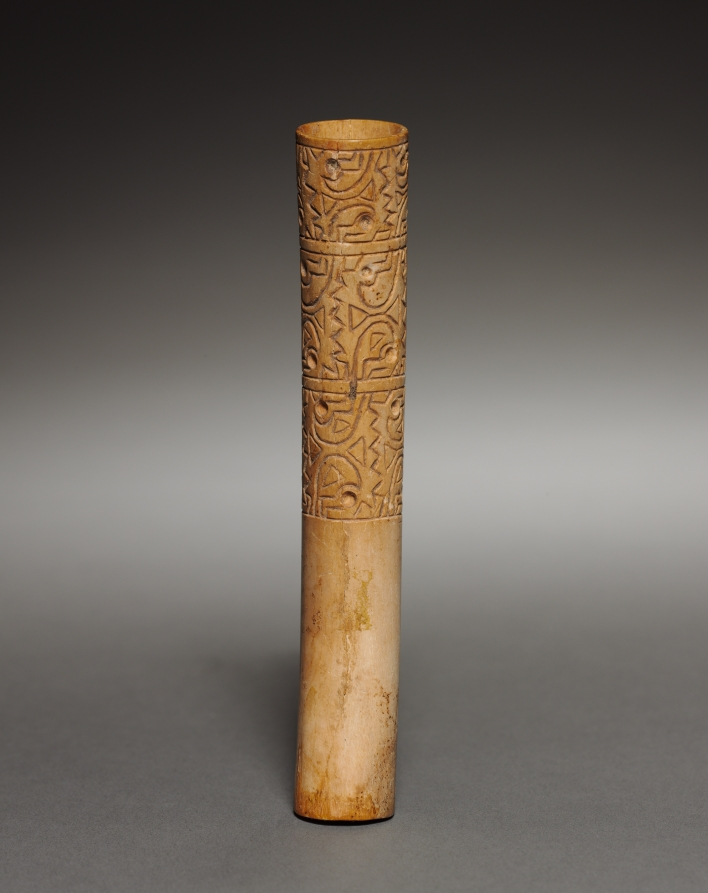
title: Ear Ornament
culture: Peru, Moche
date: 200–550 CE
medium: incised bone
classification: Jewelry